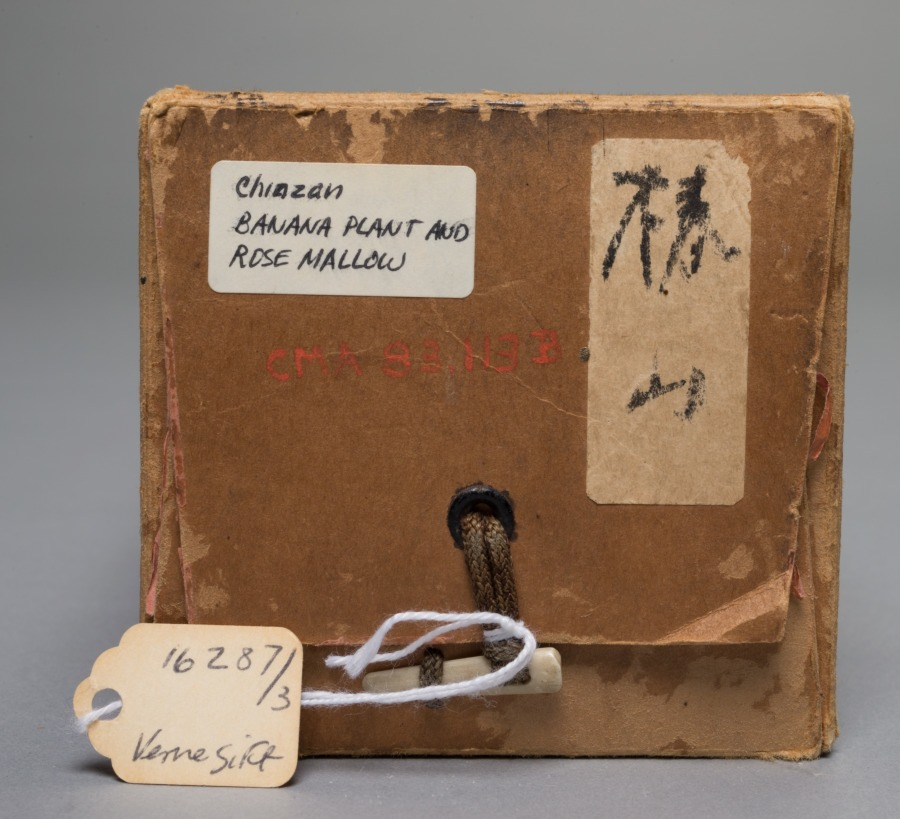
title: Banana Plant and Chrysanthemum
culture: Japan, Edo period (1615–1868)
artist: Tsubaki Chinzan (Japanese, 1801–1854)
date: c. 1820–54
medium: hanging scroll; ink and color on paper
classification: Painting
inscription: artist's inscription and two seals middle right side.